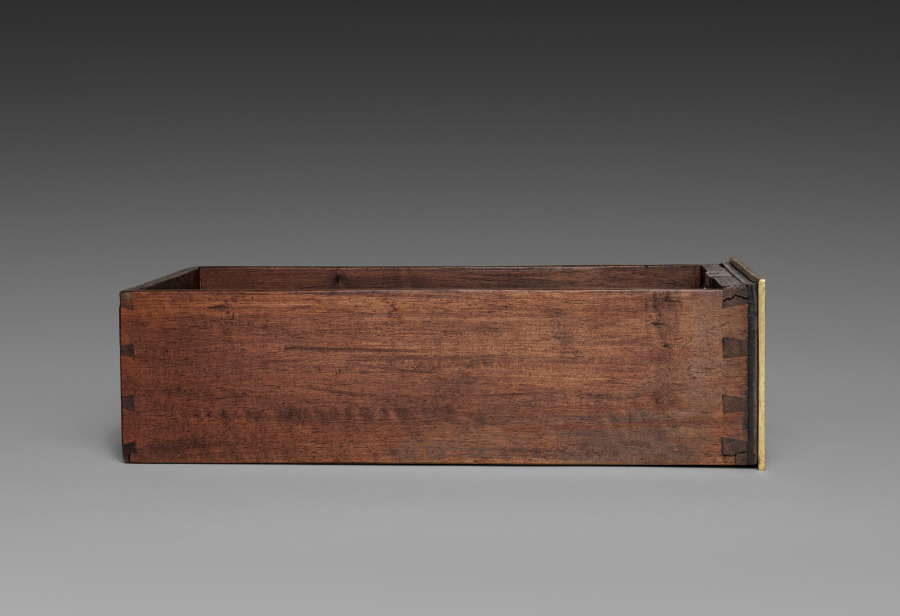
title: Side Drawer for Cabinet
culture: France, late 17th Century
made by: André-Charles Boulle (French, 1642–1732)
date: c. 1690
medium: ebony, marquetry in metal and tortoise shell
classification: Furniture and woodwork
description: Appointed cabinetmaker to King Louis XIV in 1672, André-Charles Boulle became a master of furniture making in France during the late 1600s until his death in 1732. Known primarily for his use of marquetry, in which metal patterns are inlaid into tortoiseshell then applied within the veneered surface of the furniture, Boulle established a level of quality and craftsmanship few others could achieve. As a result, his work found favor at the royal court and among other aristocrats and diplomats eager to impress the king. The inclusion of a medallion depicting Louis XIV within the bronze decoration of this chest would have identified the owner with the royal court. Often exhibiting stout architectural proportions with elegant groups of inlaid motifs such as the parrot on the central panel of this chest, Boulle’s designs are an example of the intellectual fashion for contrasting ideas, materials, and motifs.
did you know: Originally designed to sit atop an elaborate tall stand, this chest was likely altered in the late 1700s to reduce its scale and height.